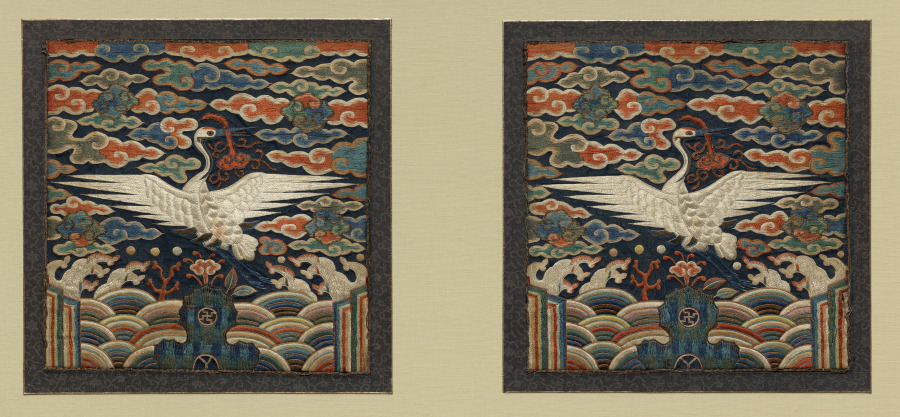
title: A Pair of Rank Badges with Single Crane Motif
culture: Korea, Joseon dynasty (1392–1910)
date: 1800s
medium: Silk, satin damask weave; silk thread embroidery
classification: Textile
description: Traditionally, square silk badges with embroidered birds and animals were worn on the front and back of official costumes. Rather than simple ornaments, rank badges represent the status of the wearer, with different animals indicating the hierarchy of ranks. The single crane, as on these rank badges, was worn by civil officials of the fourth or higher ranks.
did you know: Many different types of stitches are used in this pair of rank badges. One of them is the couching stitch that uses a thicker foundation thread and a thinner thread. In this work, gold thread is used as the foundation thread.